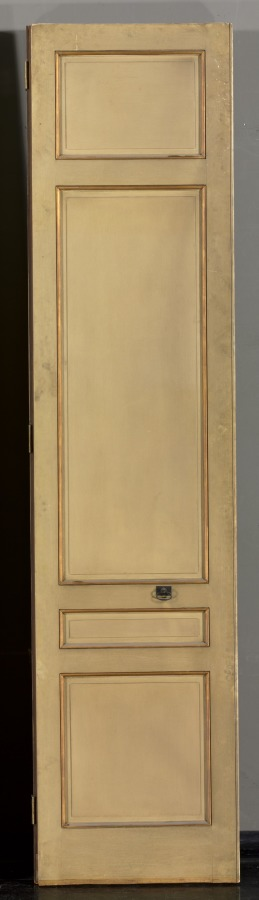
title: Double-leaf Doors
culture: France, 18th century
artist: Pierre Rousseau (French, 1751–1829)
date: 1790s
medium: oil on wood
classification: Painting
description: Shifts in style and taste often result in changes to original architectural details. Rousseau painted these doors with imitation dark wood grain. Another craftsman later scraped off the dark color surrounding the classical designs. This set was conserved in 1979 and retains more traces of the original graining than the other doors by this artist in the museum's collection.